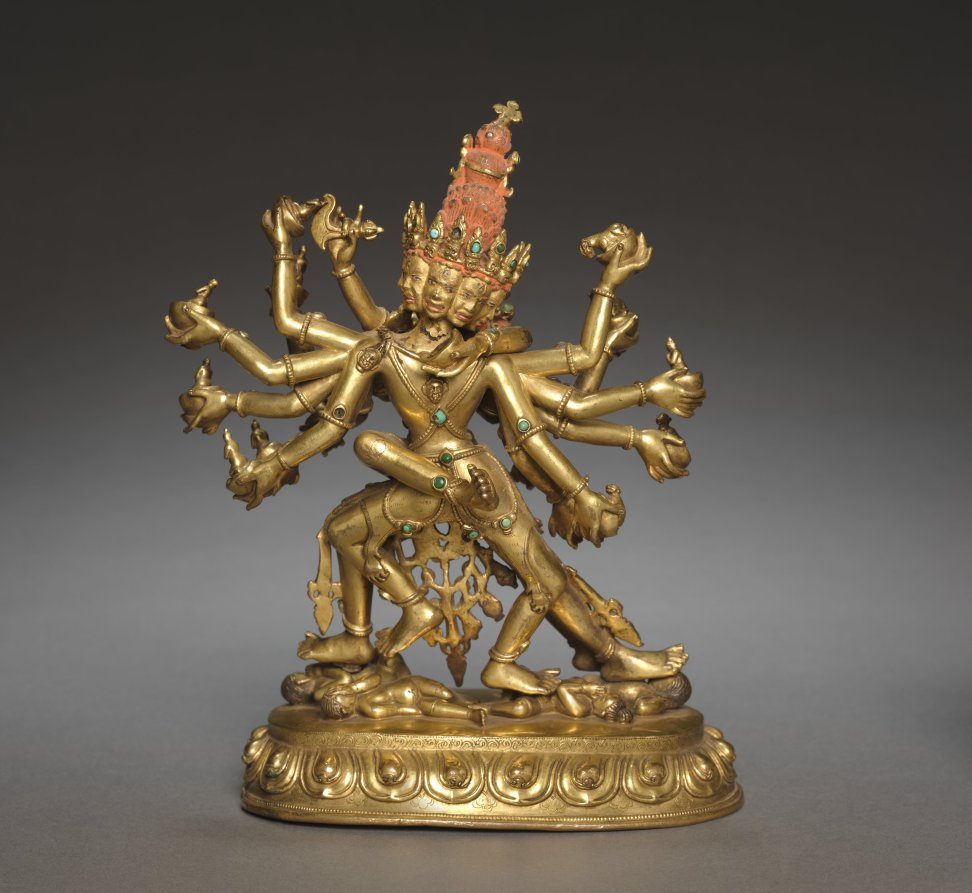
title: Hevajra and Consort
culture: Tibet, 17th century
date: 1600s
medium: gilt bronze inlaid with semiprecious stones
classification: Sculpture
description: The use of this piece in a ritual context would have indicated that practitioners were following the methods for reaching enlightenment set forth in the Hevajra Tantra text. Nairatmya, the female consort of Hevajra, appeared to the yogi Virupa (at left) in a vision and revealed to him the contents of the text, which was then passed down through a lineage of disciples. An emanation of Akshobhya, the Cosmic Buddha of the East, Hevajra holds a skull bowl in his 16 hands. The rear pair of Hevajra's four legs is shown in a dynamic dance posture, while his front two legs are in a lunge, trampling the miserable personifications of ignorance and the false sense of ego. Also trampling them is the left foot of his consort Nairatmya, who has her other leg wrapped around his waist. The figures are explicitly shown in sexual union, indicative of the bliss that comes from conquering all impediments to enlightenment.